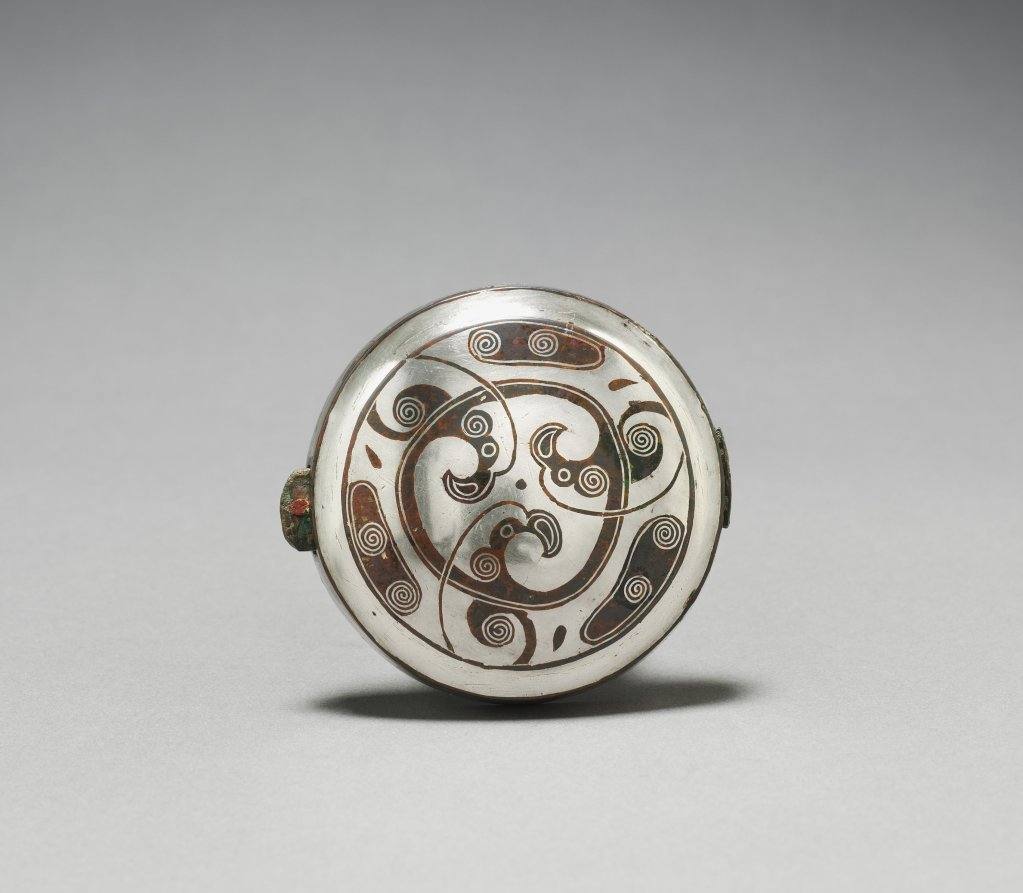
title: Chariot Handle Bar Cap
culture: China, Warring States period (475–221 BCE)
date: 475–221 BCE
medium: bronze inlaid with silver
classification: Metalwork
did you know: The cap was partially inlaid with silver to form the pattern of three stylized bird heads radiating from center.